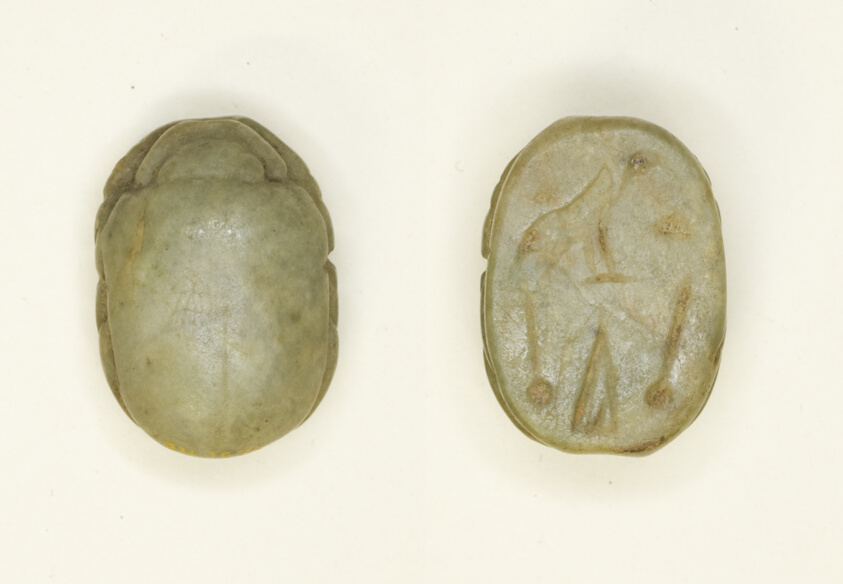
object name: Costume and Accessories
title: Scarab: Hieroglyphs (mwt-sign, nfr-signs, di-sign)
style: egyptian, ancient, late period (egyptian), third intermediate period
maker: Egyptian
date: Third Intermediate Period–Late Period, Dynasties 21–30 (about 1069–343 BCE)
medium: Stone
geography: Egypt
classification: scarab; ancient art; costume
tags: Hieroglyphs, insects